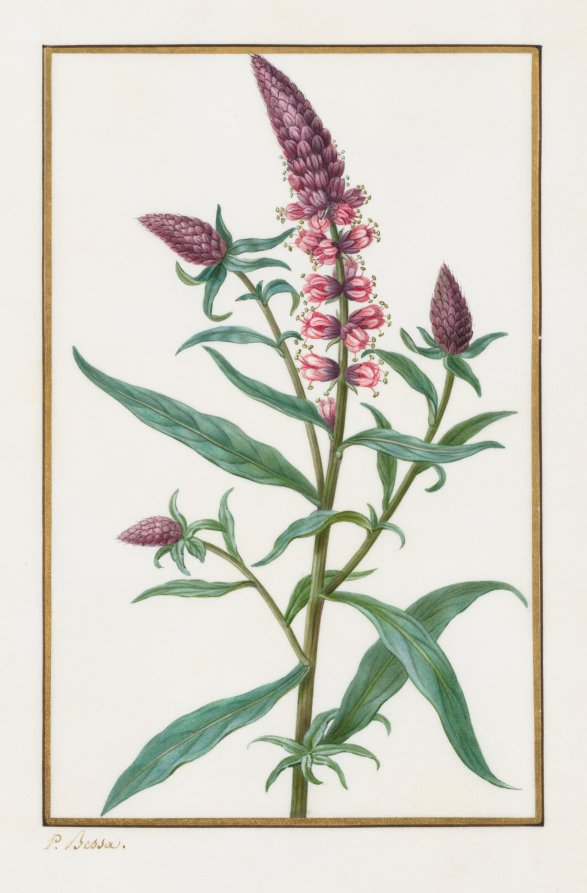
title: Untitled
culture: France, 19th century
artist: Pancrace Bessa (French, 1772–1846)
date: 1828–1835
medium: pencil and watercolor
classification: Drawing